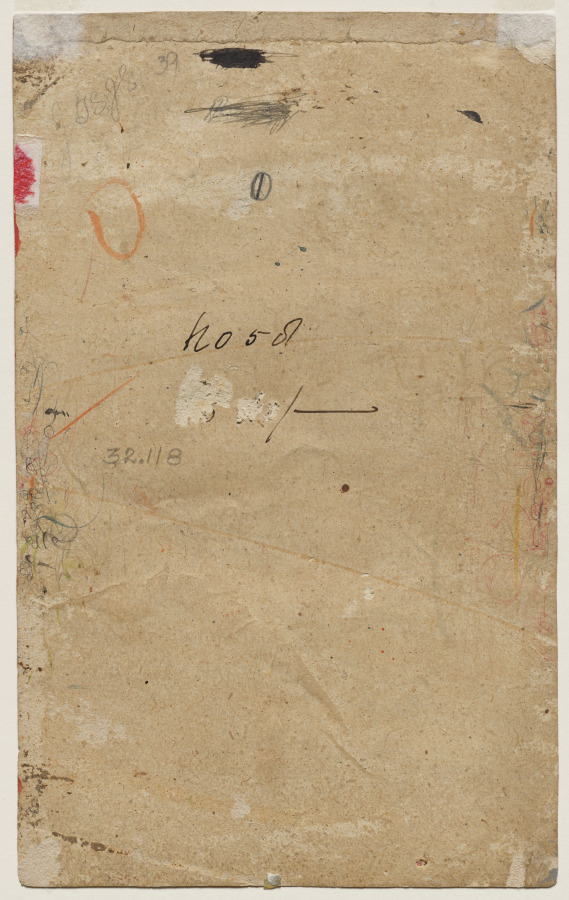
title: The heroine who waits anxiously for her absent lover (Utka Nayika)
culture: Northern India, Pahari kingdoms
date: c. 1800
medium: Gum tempera on paper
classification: Painting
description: Inspired by devotional poetry that likens the waiting for divine favor to that of a woman alone in the forest waiting for her lover, Pahari painters mastered portrayals of this subject. Darkness has fallen, but the moon and stars and jasmine flowers brighten the night. However, monsoon clouds approach in the distance, suggesting impending danger and misery. Her gesture and expression suggest a mixture of hope and heightened uncertainty about how much longer she should continue to wait.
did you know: Utka Nayika is often shown standing or resting on a bed of leaves.